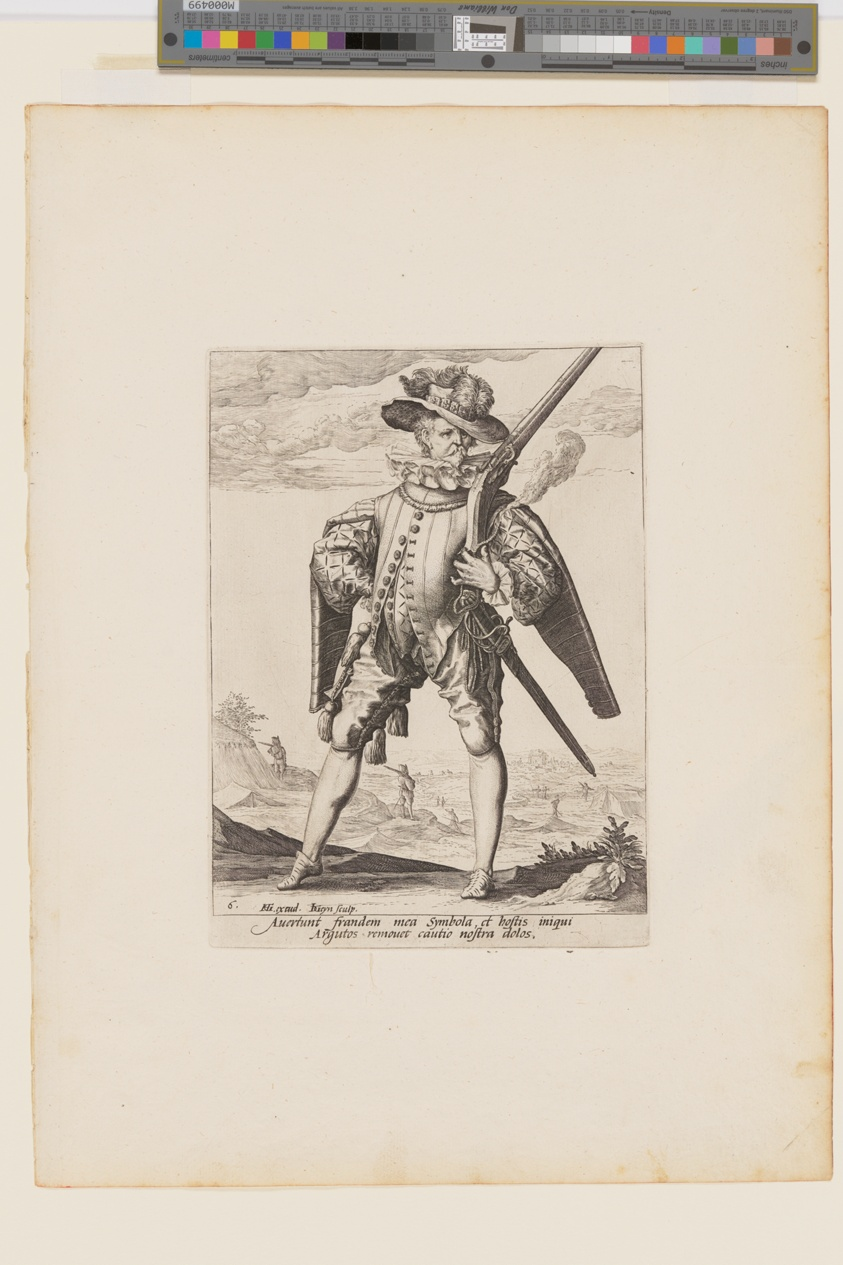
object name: Print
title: Musketeer, from Officers and Soldiers of the Bodyguard of Emperor Rudolph II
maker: Jacques de Gheyn II (Dutch, 1565–1629); after Hendrick Goltzius (Dutch, 1558–1617)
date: 1587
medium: Engraving on ivory laid paper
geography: Netherlands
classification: engraving; paper; print; prints and drawing